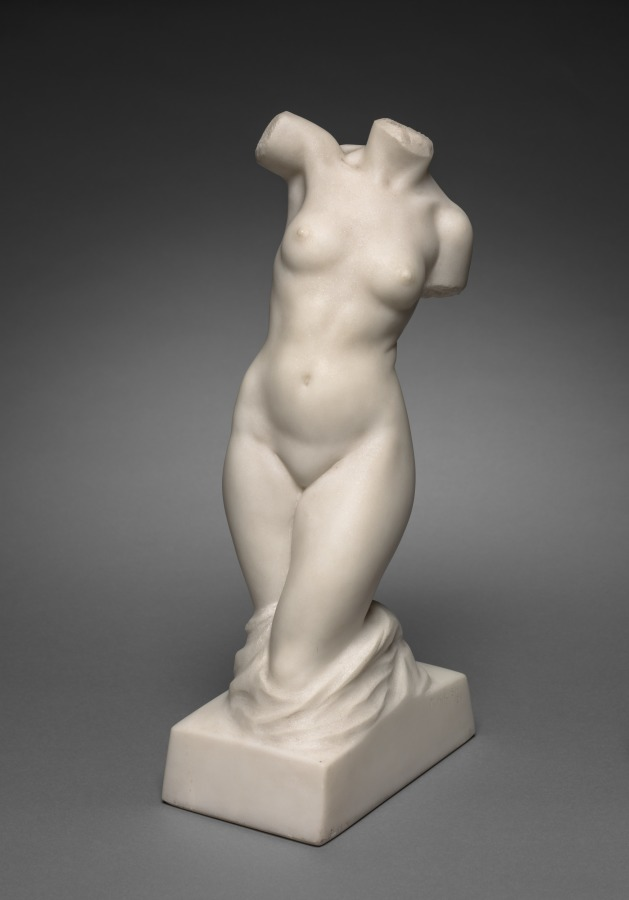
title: Torso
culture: America, Ohio, Cleveland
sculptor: Max Kalish (American, born Russian Empire [now Lithuania], 1891–1945)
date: 1924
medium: marble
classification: Sculpture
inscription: Signed on right side near side of base.: "M. Kalish 24"